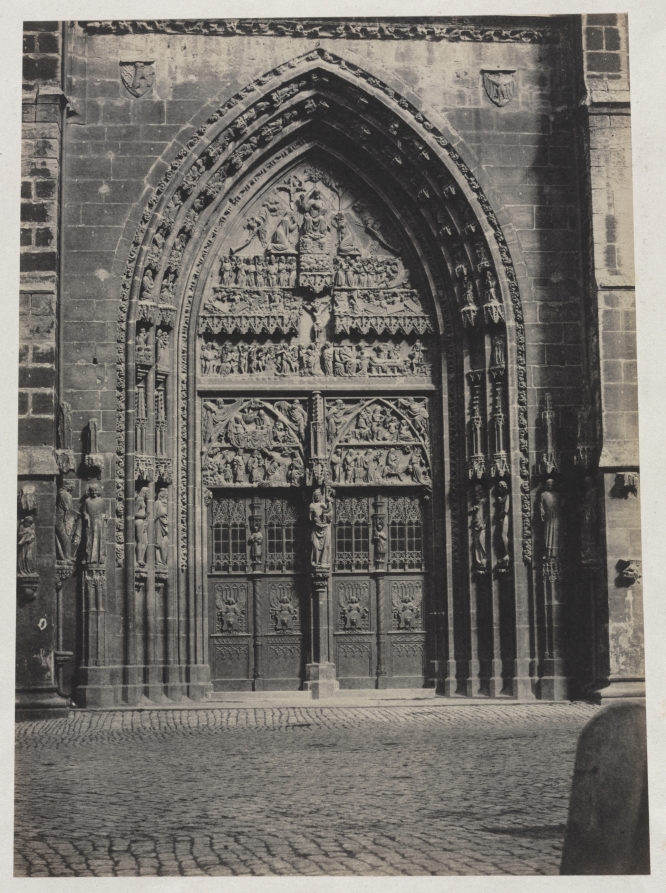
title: Entrance, St. Lorenz Cathedral, Nuremberg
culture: France, 19th century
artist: attributed to Schrag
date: c. late 1850"s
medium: Albumen print from a paper negative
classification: Photograph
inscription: Written in pencil: "Portal der (unidentified word) in Nuremberg"